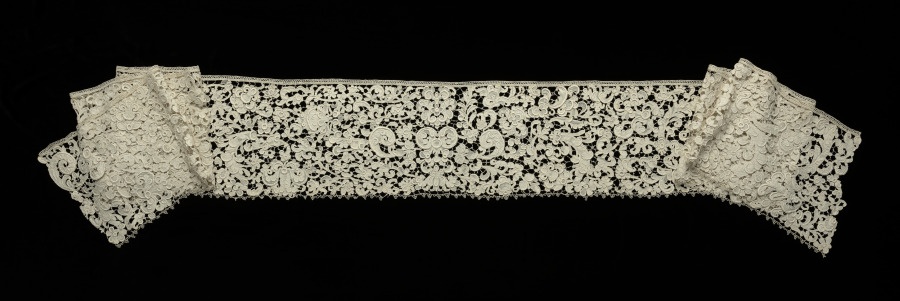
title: Lace Flounce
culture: Italy, Venice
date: 1600s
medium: Linen: needle lace (Venetian raised point)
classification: Lace